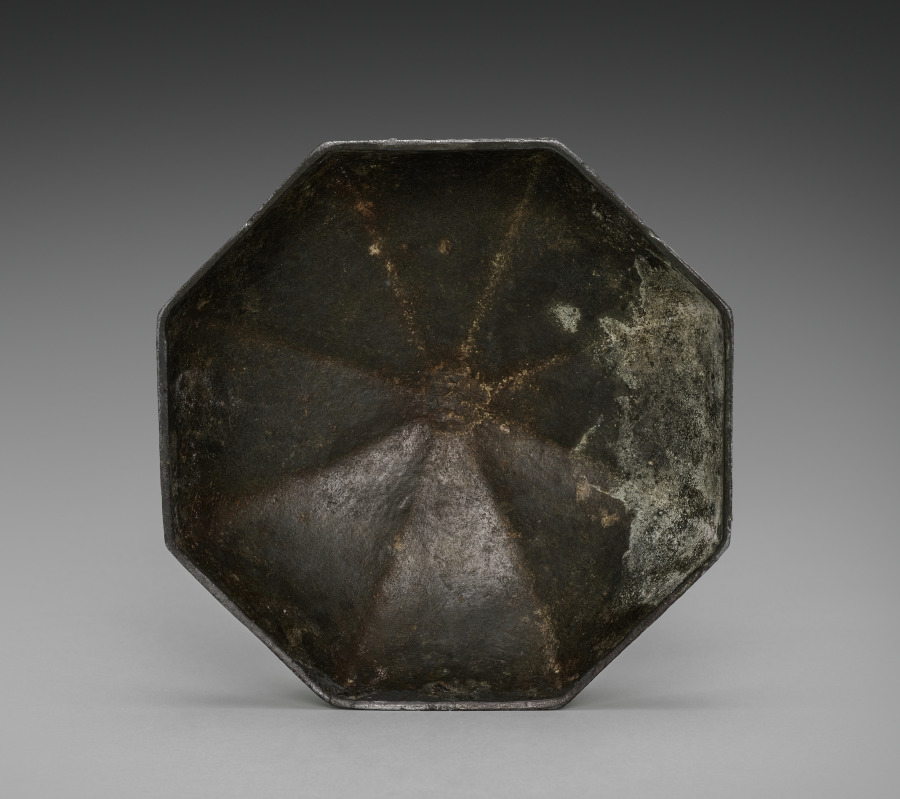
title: Lid for a Bidri Pandan with Chevrons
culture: Southwestern India, Deccan, Karnataka, Bidar​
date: c. 1700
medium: Zinc alloy with silver overlay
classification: Metalwork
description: A pandan is a lidded vessel for serving paan, which has been enjoyed in India for more than two thousand years. Paan is betel or areca nut mixed with lime powder, aromatics such as clove cinnamon, or cardamom, and wrapped in betel leaf. The whole packet is chewed after a meal as a mild stimulant and mouth freshener.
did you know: The lime powder in paan functioned as an ancient antacid after meals.